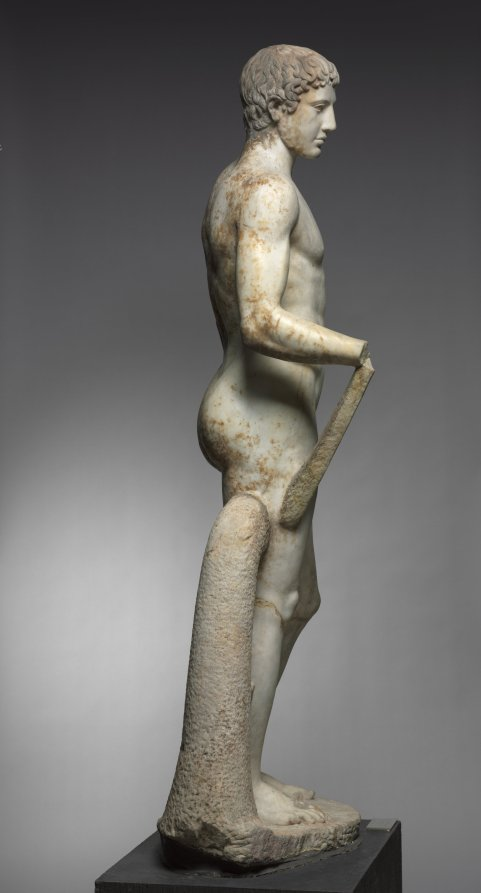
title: Statue of an Athlete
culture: Italy, Roman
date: 1–100 CE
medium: marble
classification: Sculpture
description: This idealized athlete recalls Greek sculptural types invented and popularized during the 400s BC. Large-scale athletes and other sculptures like this were originally created by famous artists as sanctuary dedications. Centuries later, they were widely copied and adapted by Roman sculptors, whose clients sought their own versions of earlier masterpieces. Working in marble rather than bronze, these sculptors added certain elements for stability, such as the struts and the large tree trunk beside the right leg here. Sculptures like this one are profoundly complex, made by and for Romans but descended from Greek ancestors.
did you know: For many years, this sculpture stood in the rotunda of the Cleveland Museum of Art.